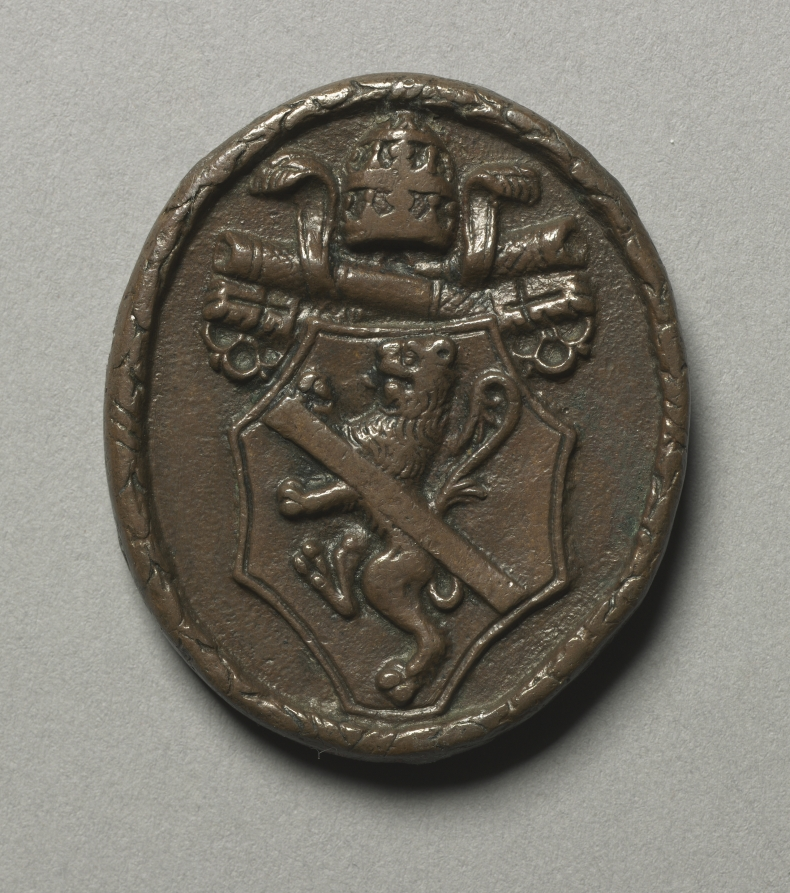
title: Portrait of Pope Paul II Barbo (reverse)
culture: Italy, 15th century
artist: Cristoforo di Geremia (Italian, active 1456–76)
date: c. 1468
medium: bronze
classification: Sculpture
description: Rediscovered with fervor in the Renaissance, profiles on ancient coins provided dignified models for Renaissance elites.